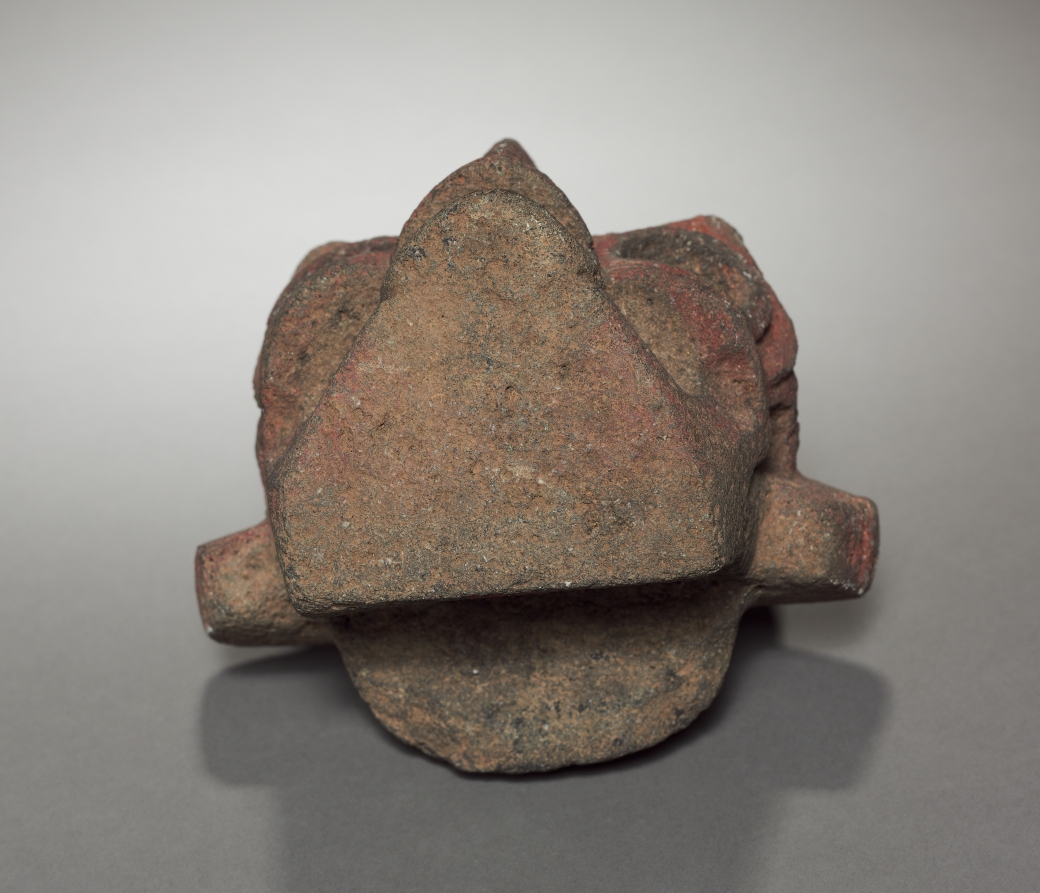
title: Head Hacha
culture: Mexico, Veracruz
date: 300–900 CE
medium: gray volcanic stone with red pigment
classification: Sculpture